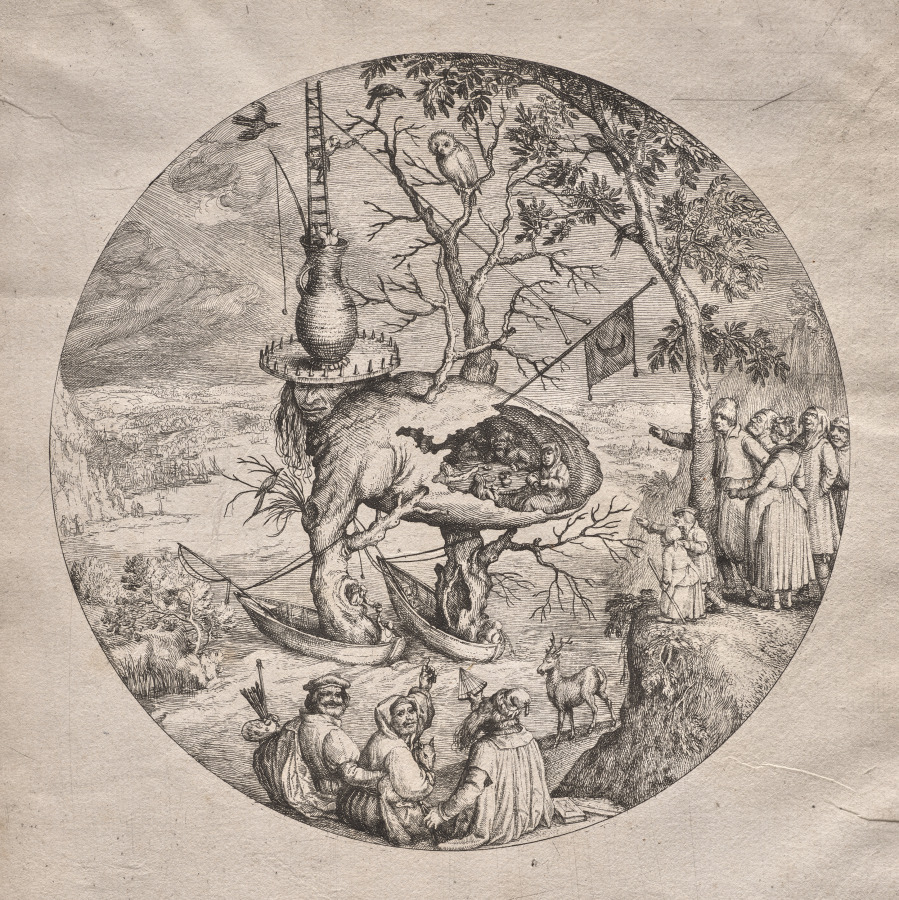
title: The Tree Man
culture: Netherlands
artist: after Hieronymous Bosch (Netherlandish, c. 1450–1516)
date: c. 1560–1600, first edition printed c. 1715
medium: etching and engraving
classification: Print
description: Hieronymus Bosch is largely considered the first European artist to give free rein to his imagination, as embodied in his depiction of fantastic, often diabolical creatures in the context of the traditional Catholic altarpiece. Based on a drawing by Bosch now at the Albertina Museum, Vienna, this etching of the Tree Man cleverly and uncannily merges anthropomorphic, organic, and man-made elements into a monstrous creature who stands at the center. The creature combines various proverbial subjects that appear throughout Bosch’s oeuvre, such as a ship of fools (denoting collective foolishness), and a cracked egg (a symbol of earthly vanity). Onlookers to the right and below act as witnesses to the folly. In the Christian context within which Bosch made the composition, the figure may broadly be understood as an image of sinful decrepitude. Yet, the Tree Man’s significance cannot be reduced to single, definitive meaning.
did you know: At the bottom of the composition Bosch portrays a painter, an astronomer, and an Aesopian figure (or fableist), practitioners who use illusion to convey the world’s truths, and might be interpreted as Bosch himself.